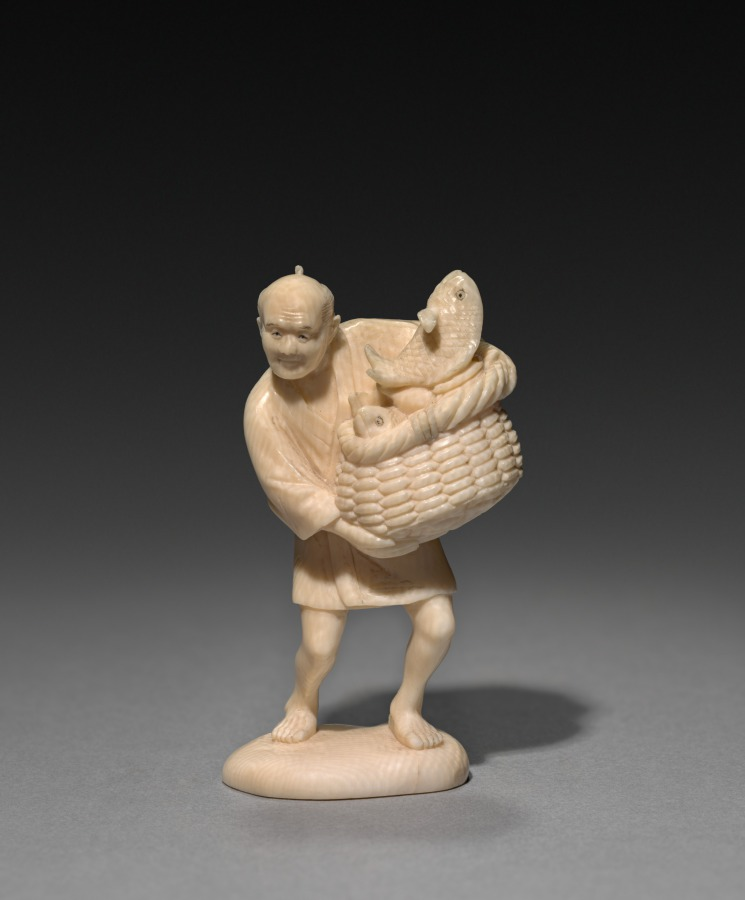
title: Man Carrying a Basket of Fish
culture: Japan, Meiji period (1868–1912)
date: early 1900s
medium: ivory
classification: Ivory